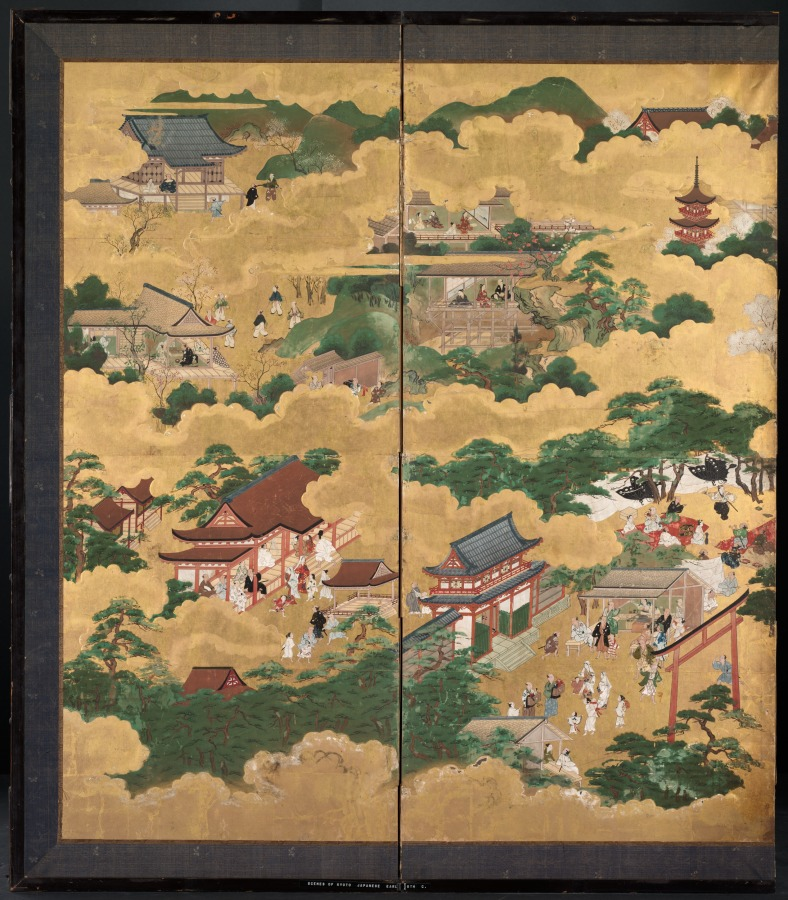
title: Views of Kyoto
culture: Japan, Edo period (1615–1868)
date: 1600s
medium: six-fold screen; ink and color on gold paper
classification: Painting